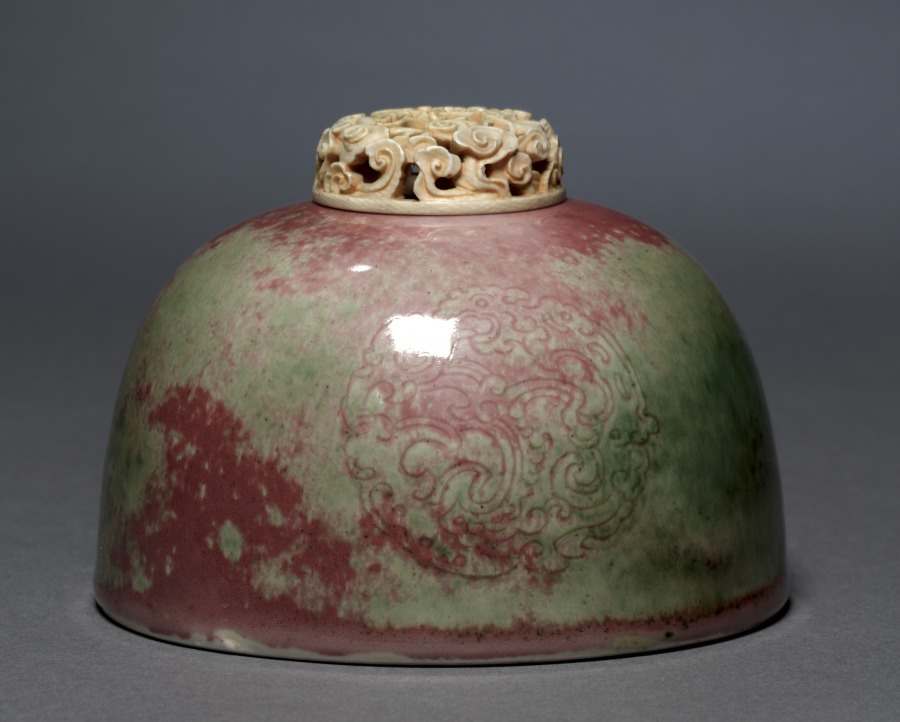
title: Water Pot with Ivory Lid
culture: China, Jiangxi province, Jingdezhen, Qing dynasty (1644-1911), Kangxi period (1662-1722)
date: 1662–1722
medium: porcelain with peach bloom glaze; ivory lid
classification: Ceramic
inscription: 大清康熙年制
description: The "peach-bloom" glaze developed during the Kangxi era has been described as "drunken with beauty." The water pot's glaze is in shades ranging from red to grayish rose. The interior and base are covered in white glaze.